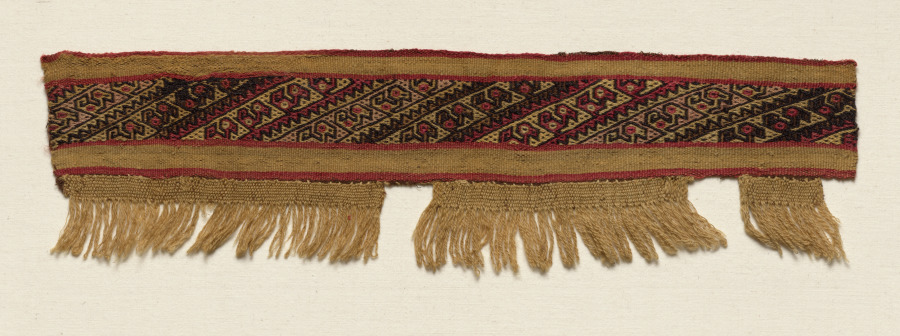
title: Three Fragments of a Border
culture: Peru, Central Coast, Chancay, 12th-15th century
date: c. 1100–1400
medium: tabby with inset border of fancy twill, brocaded; cotton and wool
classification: Textile